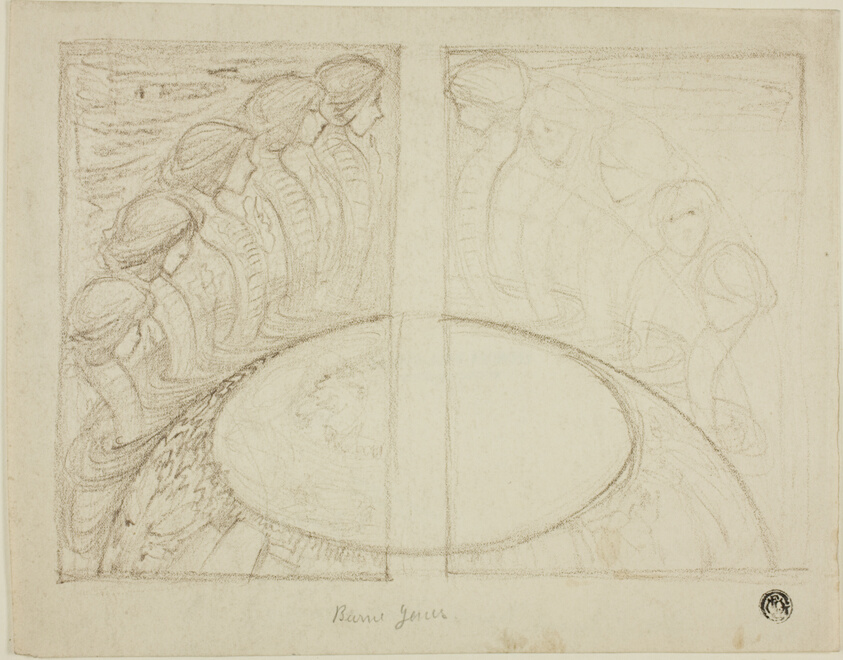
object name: Drawing and Watercolor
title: Serpent Women Around Globe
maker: Sir Edward Burne-Jones (English, 1833-1898)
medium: Brown crayon on buff wove paper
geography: England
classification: crayon; drawings (visual works); prints and drawing